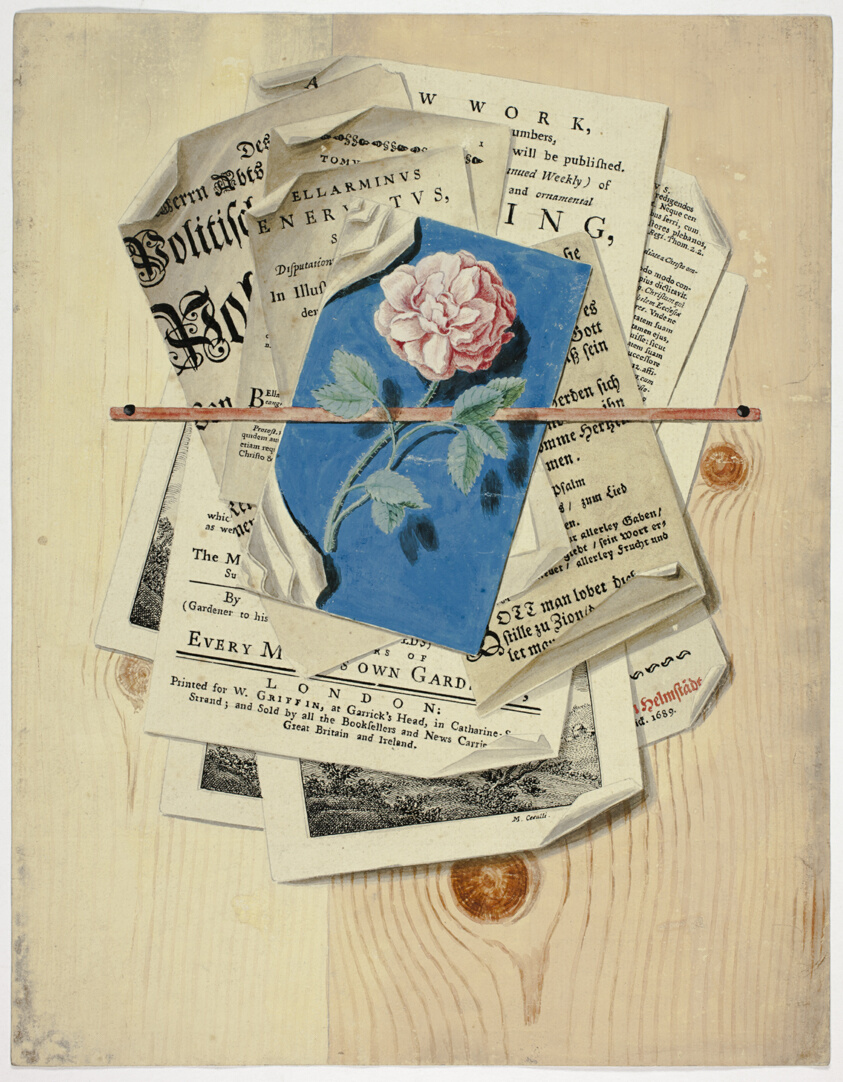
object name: Drawing and Watercolor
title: Trompe l'Oeil of Posted Notices and Prints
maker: Martin Cerulli (German, c. 1715-after 1765)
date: 1735/1765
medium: Pen and black ink with brush and watercolor and gouache, over traces of graphite, on ivory laid paper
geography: Germany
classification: pen and ink drawings; drawings (visual works); prints and drawing